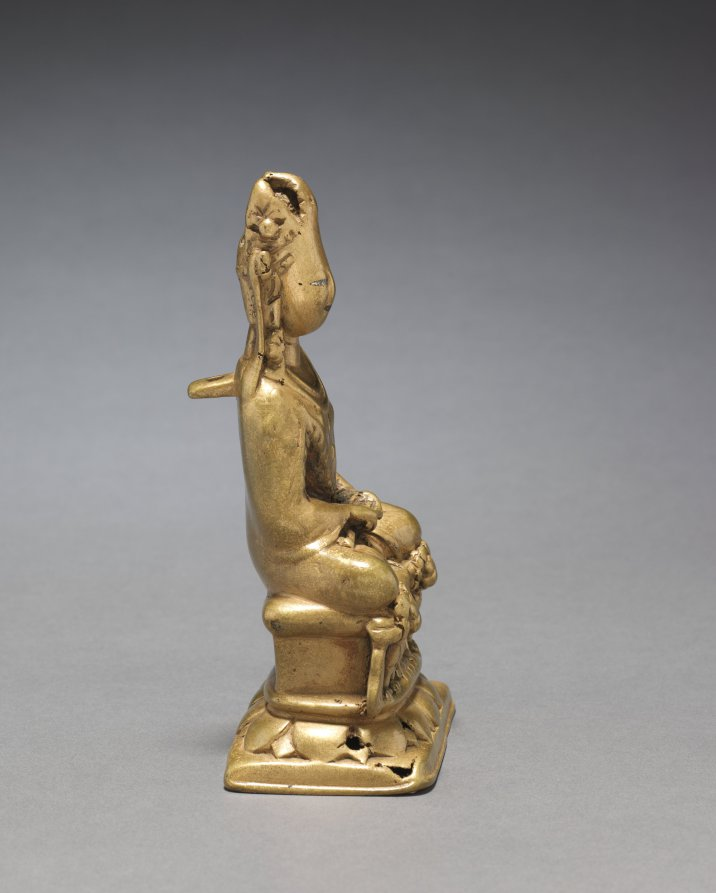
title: Crowned Buddha Seated on a Lion Throne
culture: India, Kashmir, 8th century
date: 700s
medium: brass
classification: Sculpture